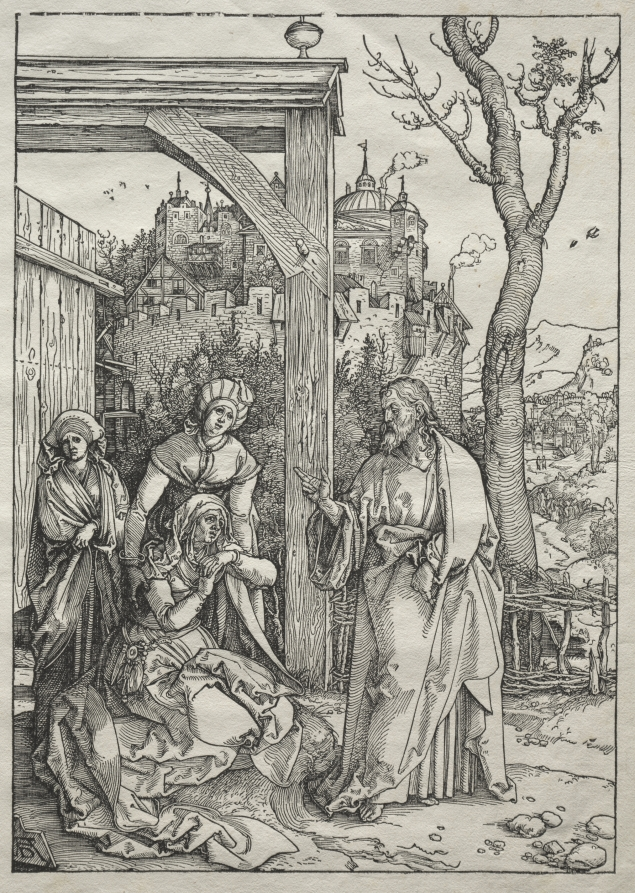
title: Life of the Virgin: Christ Taking Leave of His Mother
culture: Germany, early 16th Century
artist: Albrecht Dürer (German, 1471–1528)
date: 1504–1505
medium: woodcut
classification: Print